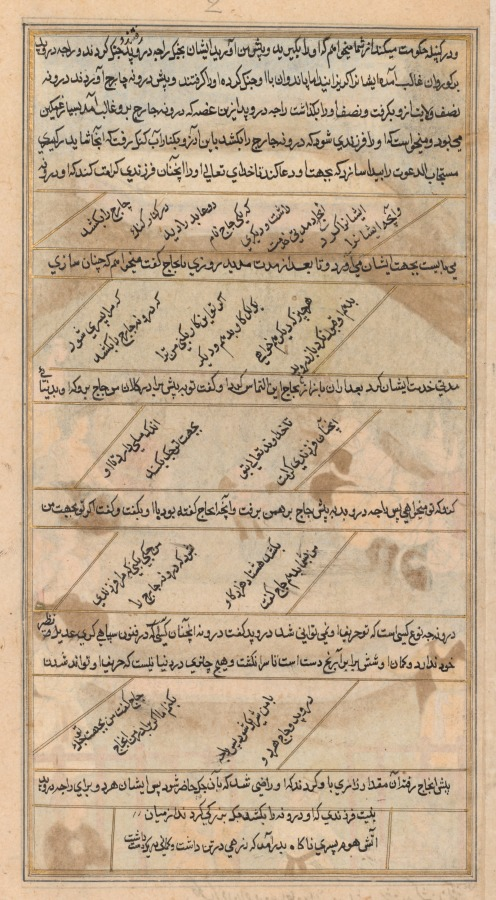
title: Yaja and Upayaja perform a sacrifice for the emergence of Dhrishtadyumna from the fire, from Adi-parva (volume one) of the Razm-nama (Book of Wars) adapted and translated into Persian by Mir Ghiyath al-Din Ali Qazvini, known as Naqib Khan (Persian, d. 1614) from the Sanskrit Mahabharata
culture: Mughal India; made for Abd al-Rahim the Khan Khanan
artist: attributed to Bilal Habshi (probably Ethiopian, active late 1500s)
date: 1598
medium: Gum tempera, ink, and gold on paper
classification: Painting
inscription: Inscriptions around painting: Ascribed to Bilal Habashi (probably Ethiopian, active late 1500s) Mughal court, made for Abd al-Rahim the Khan Khanan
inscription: Persian inscription in bottom margin, in nasta‘liq script: The performing of a sacrifice by King Drupada with Yaja and Upayaja and the appearing of Dhrishtadyumna and Draupadi from the fire; Bilal-i Habashi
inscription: Persian inscription at edge of bottom margin, in nasta‘liq script: and sword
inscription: Calligraphy: Persian text in naskh script: “. . . and rules in Panchala. I want you to take him and bring him to me.” They went to war with Drupada and fought a battle, and King Drupada managed to overcome the Kauravas and put them to flight, but the Pandavas fought him and brought him to Master Drona. Droṇa took half of his [Drupada’s] kingdom from him and left him the other half. King Drupada was extremely distressed that Master Drona had overcome him and wished he could have an offspring who would kill Master Drona. With this desire in his mind, he went to the shores of the Ganges River so that perchance he could find a person whose prayers on his behalf to the almighty God to graciously bestow upon him an offspring capable of killing Droṇa would be accepted. By the banks of the Ganges he saw two pious worshipers. One was called Yaja and the other Upayaja. He spent some time there performing services for them and bringing them whatever they required. After a long while, one day he said to Upayaja: “I would like you to do what is needed so that I have a son who could kill Master Drona. If you do this I will give you one lakh [a hundred thousand] of cows and whatever else you demand.” Upayaja did not accept this. Once again Drupada spent time at their service, and then once again he begged Upayaja to do this. He said: “Go to my elder brother Yaja, since he still has a little attachment to this world, so that he can perform the sacrifice for you, so that the almighty God would bestow on you the offspring that you desire.” King Drupada went therefore to Yaja the brahmin and told him what Upayaja had told him and said: “If you perform the sacrifice for me so that I have son who would kill Master Drona, I would give you eighty thousand cows.” Yaja said, “What kind of a person is Master Drona that you do not deem yourself a match for him?” Drupada said, “Droṇa is the kind of person who remains without rival and peer in the arts of war. His bow is six times the length of the elbow to the fingertip, and nothing in the world can rival and overcome him.” Yaja said: “I will perform the sacrifice for you, so long as my brother Upayaja joins forces with me.” So King Drupada and Yaja both went to Upayaja and pleaded so long that he at last agreed to be present at the sacrifice. They thus made a wish for King Drupada to have a son to kill Droṇa and made a big sacrifice, and from the midst of the sacrificial fire suddenly a son emerged clad in a coat of mail holding a bow in one hand.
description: Fire sacrifice was central to the Indo-European people who entered the Indian subcontinent as early as 1800 BC. Only Brahmins, a social class of priests, had access to the sacred texts called the Vedas, which explained the meaning and process of the fire sacrifice, considered by orthodox Hindus as a way to communicate with the gods. A king named Drupada in ancient India sponsored this fire sacrifice in order to generate a powerful warrior who would be able to slay the enemy who took half his kingdom. Seated around an altar in the sacrificial enclosure, Brahmins pour oblations into the fire and recite the prayers necessary to generate the divine warrior Dhrishtadyumna, shown here in full battle armor at birth. The inscription below gives the title and the name of the artist, Habshi, which means “Ethiopian,” suggesting the presence of Africans in the royal Mughal workshop. The story of how the warrior Dhrishtadyumna was generated from the fire sacrifice is written on this page. When King Drupada lost half his kingdom to a military master named Drona, he needed a gift from the gods to defeat him: a new warrior born to accomplish this mission. In order to obtain this gift, King Drupada went to the banks of the Ganges to find two powerful Brahmins to whom the gods would respond favorably. After serving them faithfully and offering payment of 100,000 cows, the Brahmins Yaja and Upayaja agreed to perform the sacrifice. The text is written in a form of Arabic script, called naskh, in the Persian language, as translated from the original Sanskrit epic Mahabharata for emperor Akbar (r. 1556¬–1605). The passages of dialogue are written diagonally.